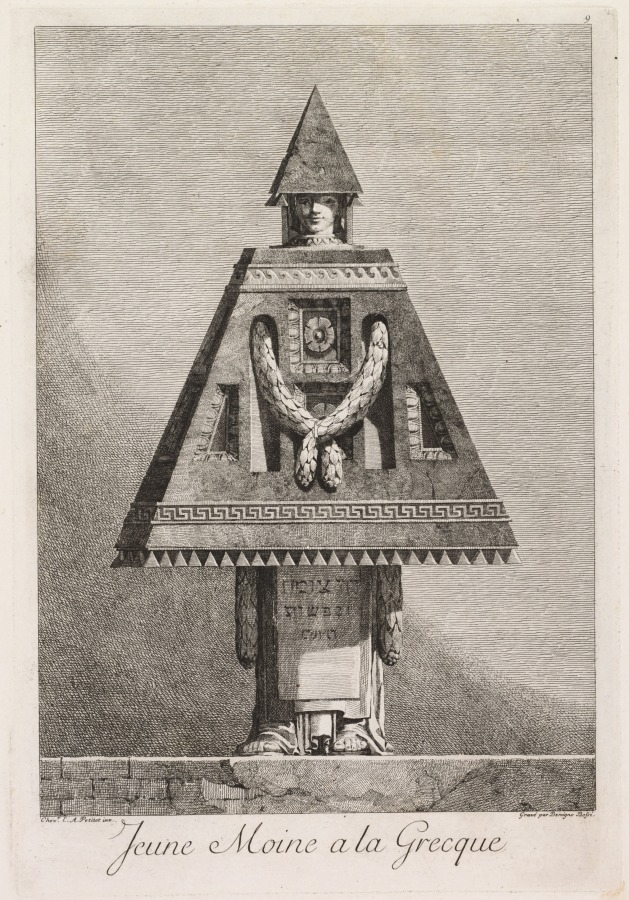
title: Young Monk in the Greek Style, Plate 9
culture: Italy, 18th century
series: Mascarade à la Grecque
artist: Benigno Bossi (Italian, 1727–1792)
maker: after Ennemond Alexandre Petitot (French, 1727-1801)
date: 1771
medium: etching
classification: Print